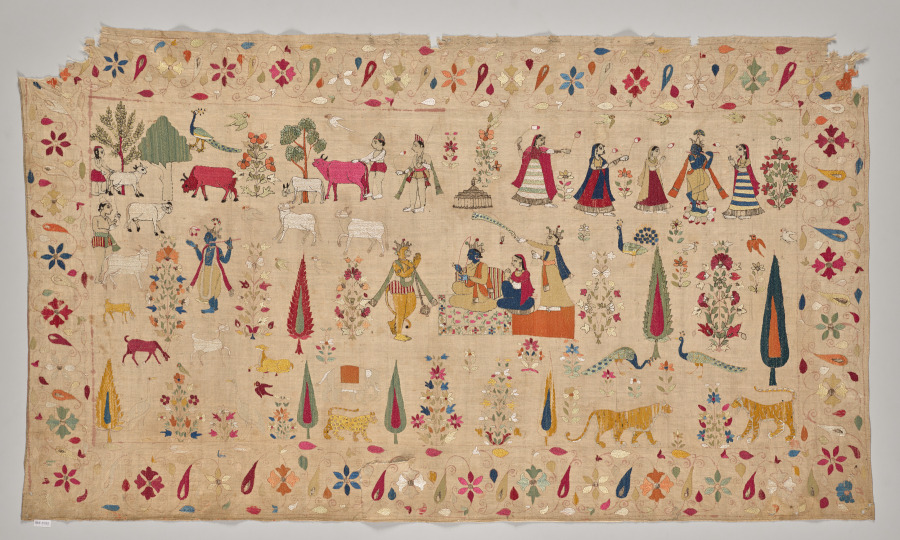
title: Rumal with Rama and Krishna scenes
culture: Northern India, Pahari Kingdom of Chamba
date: 1700s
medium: Silk and silver wire on cotton; embroidery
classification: Embroidery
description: Rumal refers to a double-sided embroidery technique perfected by women in the Pahari region of the northwest Himalayas. Unlike other forms of embroidery, no knots or loose strings are visible. Rumals were intended to look like paintings on cloth. An artist who was skilled in making Pahari paintings drew outlines of the composition with a brush on hand-loomed cotton muslin fabric and noted the colors to be used. Women then used a type of stitch called “double satin stitch” to create flat planes of color on both sides of the fabric. Girls were responsible for winding the silk threads into multistrand embroidery floss. Rumals were treasured as objects of wealth and given as gifts during weddings or state ceremonies. Many rumals depict subjects drawn from Hindu devotional literature. In the center, the semidivine monkey general Hanuman pays his respects to his lord Rama, Rama’s wife Sita, and Rama’s brother Lakshmana. Surrounding them above and to the right are bucolic rural scenes from the life of Krishna, another human incarnation of the god Vishnu. Krishna with his flute serenades the gopis (women of the cow herding community) and entertains his friends the cowherd boys (gopas). Flowering plants, vines, and wild animals populate the remaining space and borders. With such scenes, the painstaking act of double-sided embroidery becomes a devotional endeavor that generates religious merit.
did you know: Especially in the borders, some of the embroidery has fallen away, revealing the brushwork of the designer.